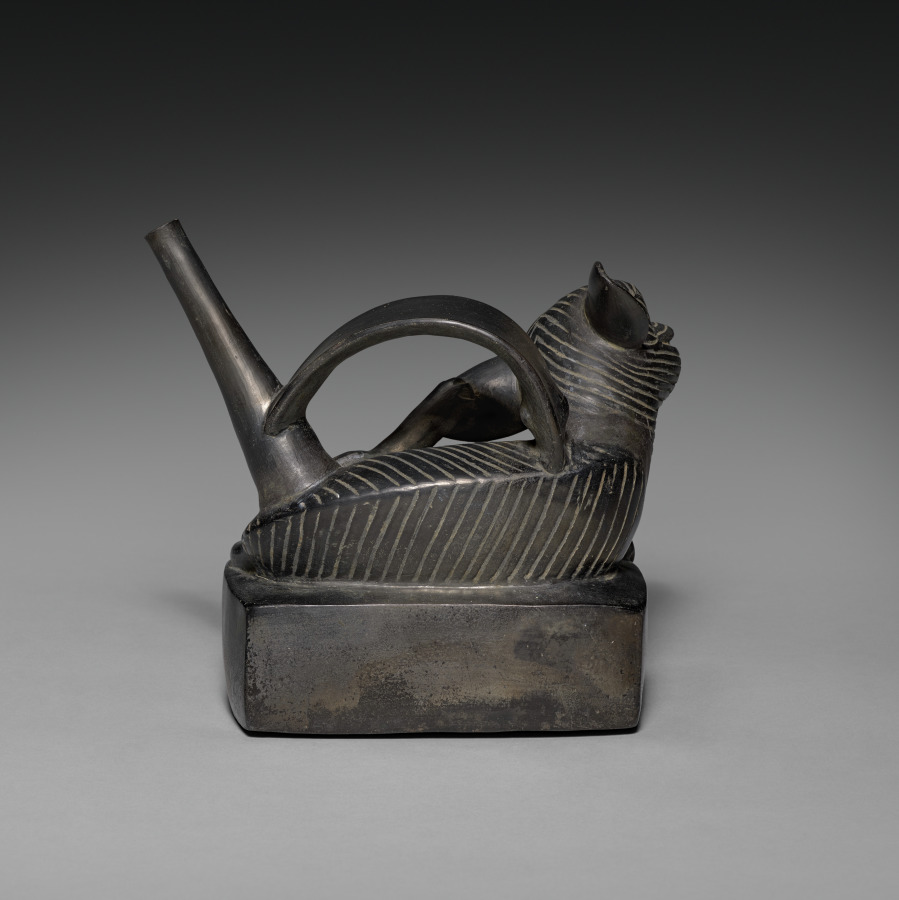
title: Vessel with Reclining Dog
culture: Central Andes, North Coast, Chimú-Inka style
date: 1470–1532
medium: ceramic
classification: Ceramic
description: This vessel represents a Peruvian hairless dog who has recently given birth and seems to be taking a break from maternal obligations. The meanings of such dogs may be connected to the trade networks that brought them to Peru from Mexico in the late pre-Hispanic period. Perhaps these foreign ties made them prestige animals whose breeding engendered further status for the owner.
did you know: This vessel represents a Peruvian hairless dog who has recently given birth.